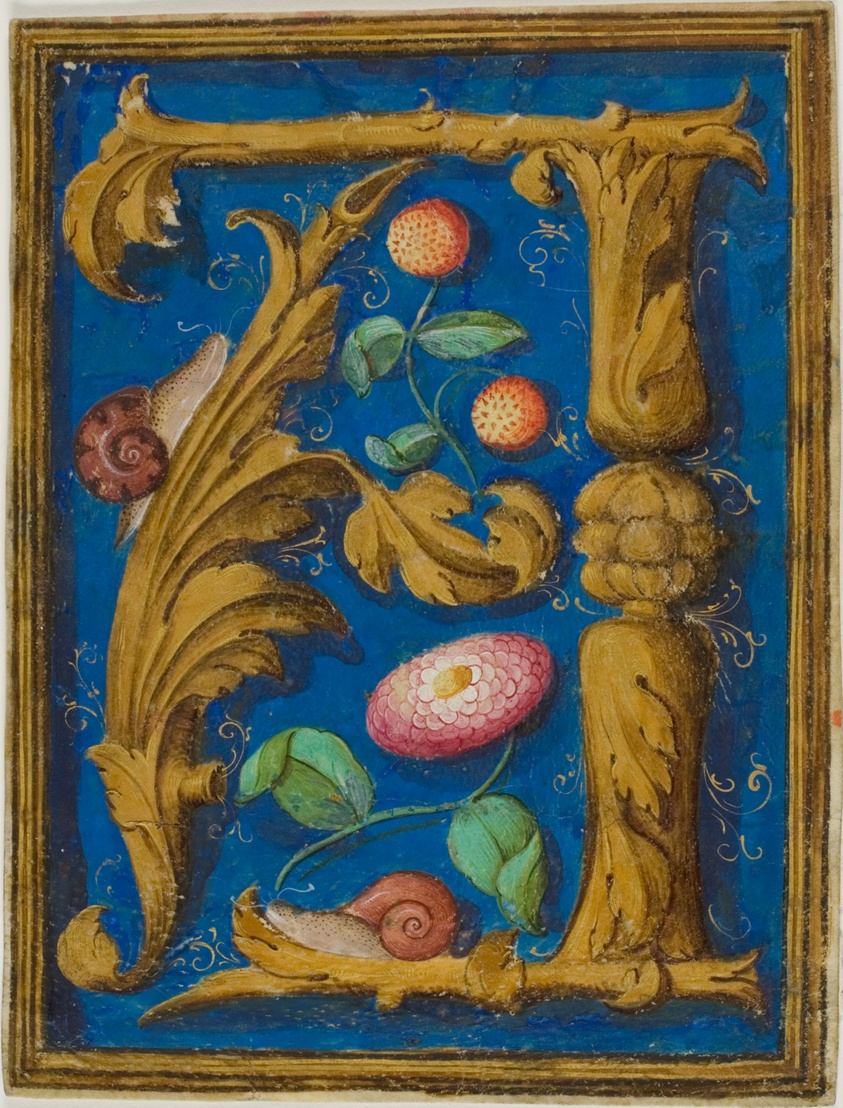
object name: Drawing and Watercolor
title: Snails, Strawberries and a Flower in a Decorated Initial "A" from a Manuscript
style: medieval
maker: European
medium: Manuscript cutting in tempera, gold paint, and brown ink on vellum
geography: Europe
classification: tempera; manuscript; drawings (visual works); prints and drawing